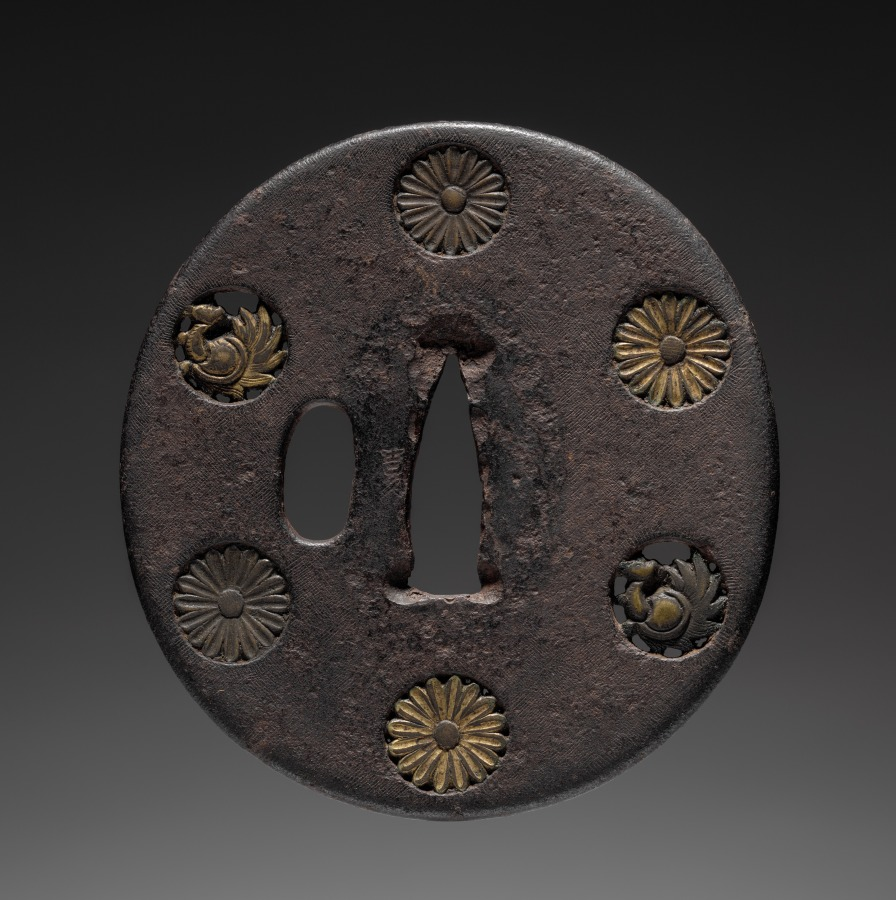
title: Sword Guard (Tsuba) with Tortoises and Chrysanthemums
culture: Japan, possibly Edo period (1615-1868)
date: c. 1615–1868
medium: iron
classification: Arms and Armor